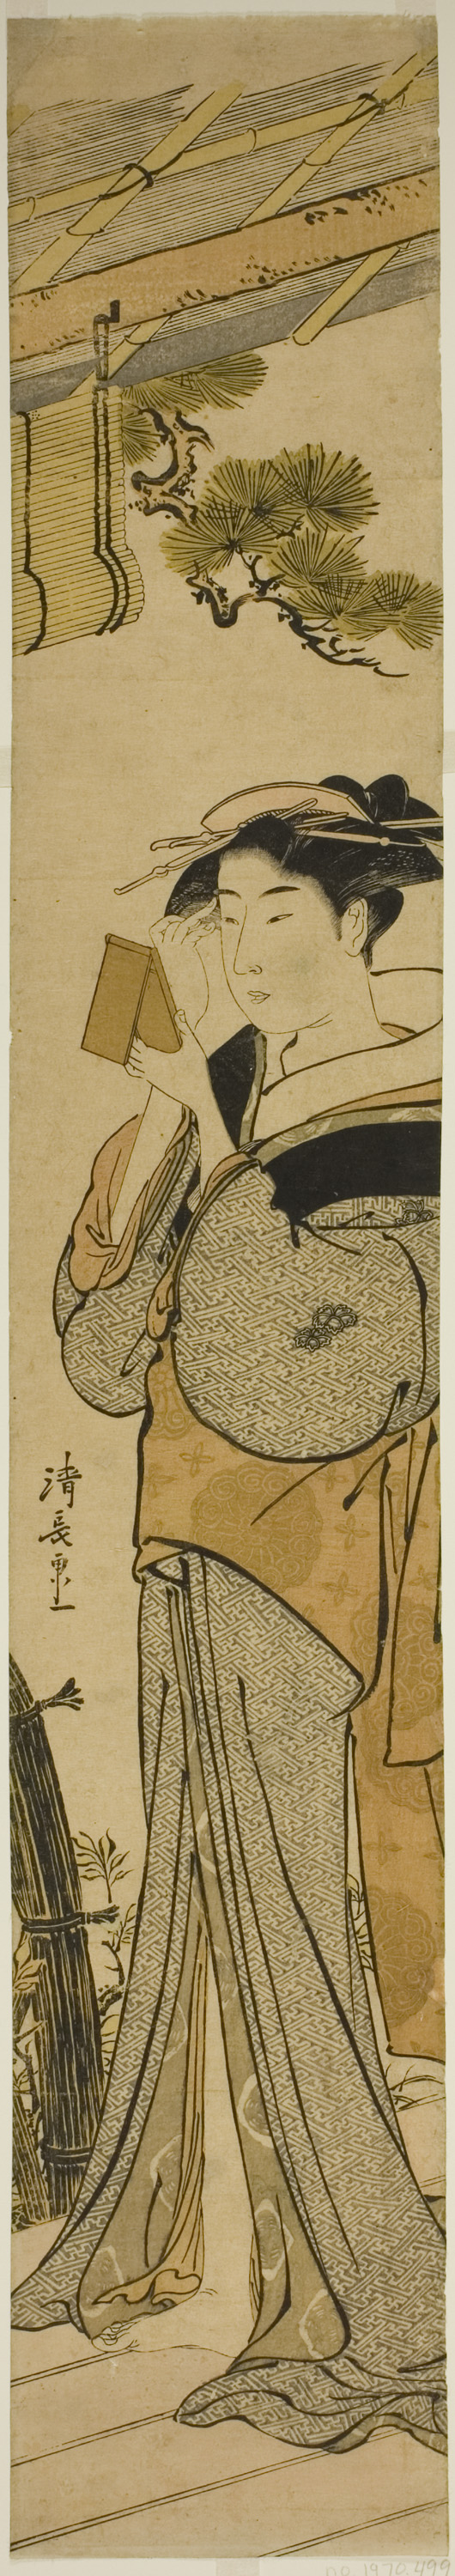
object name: Print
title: Geisha Applying Makeup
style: Japanese (culture or style)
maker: Torii Kiyonaga (Japanese, 1752-1815)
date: c. 1781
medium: Color woodblock print; hashira-e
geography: Japan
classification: woodblock print; print; asian art